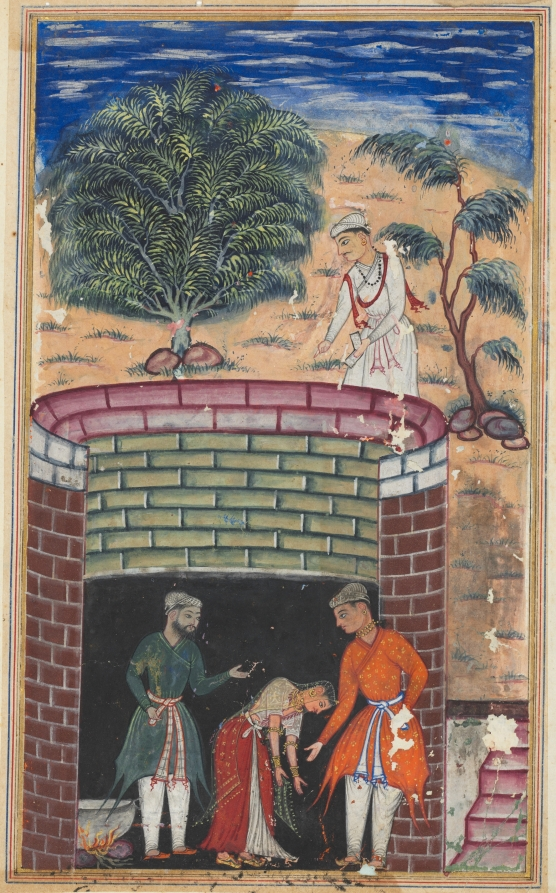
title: The daughter of the king of the jinns bows before the King of Kings who has just undergone the ordeal of passing through the boiling oil to emerge as a youth, from a Tuti-nama (Tales of a Parrot): Seventh Night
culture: Mughal India, court of Akbar (reigned 1556–1605)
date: c. 1560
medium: gum tempera, ink, and gold on paper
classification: Painting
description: The rejuvenated King of Kings, dressed in orange, stands at the bottom of a pit with the daughter of the king of the jinns and her elderly lover. The Brahman, dressed in white, peers over the edge. The King rubs the old man with the elixir of life so that he can pass through the oil and be purified.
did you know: The boiling oil purifies the old man by burning away his animal characteristics.